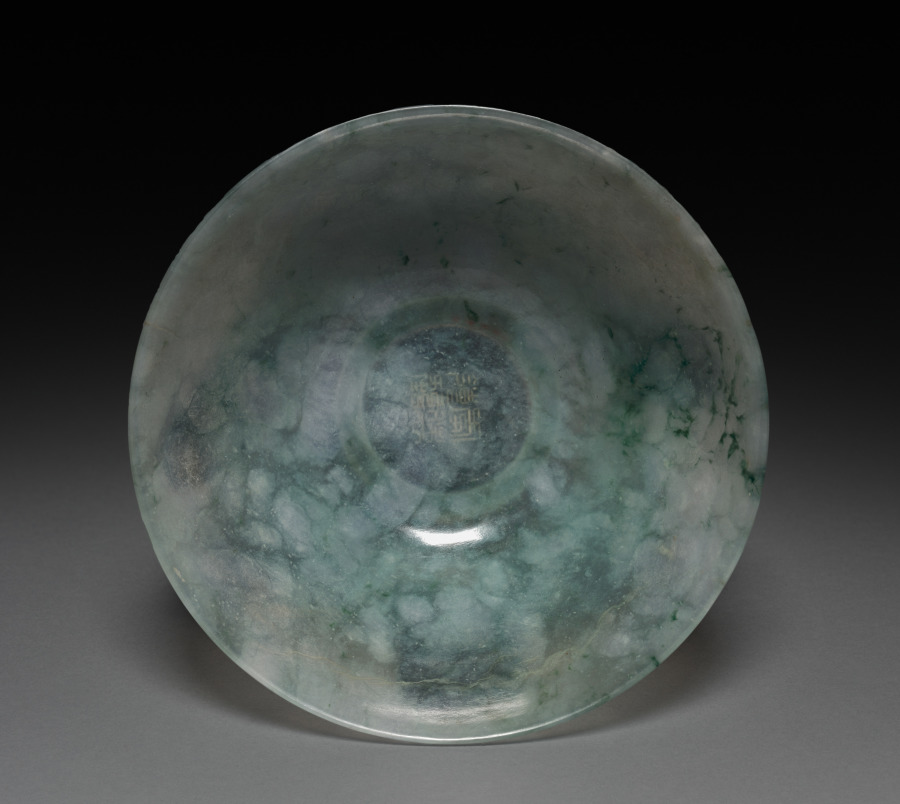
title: Bowl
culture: China, Qing dynasty (1644–1911), Qianlong mark and reign (1736–95)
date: 1736–95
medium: jade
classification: Jade